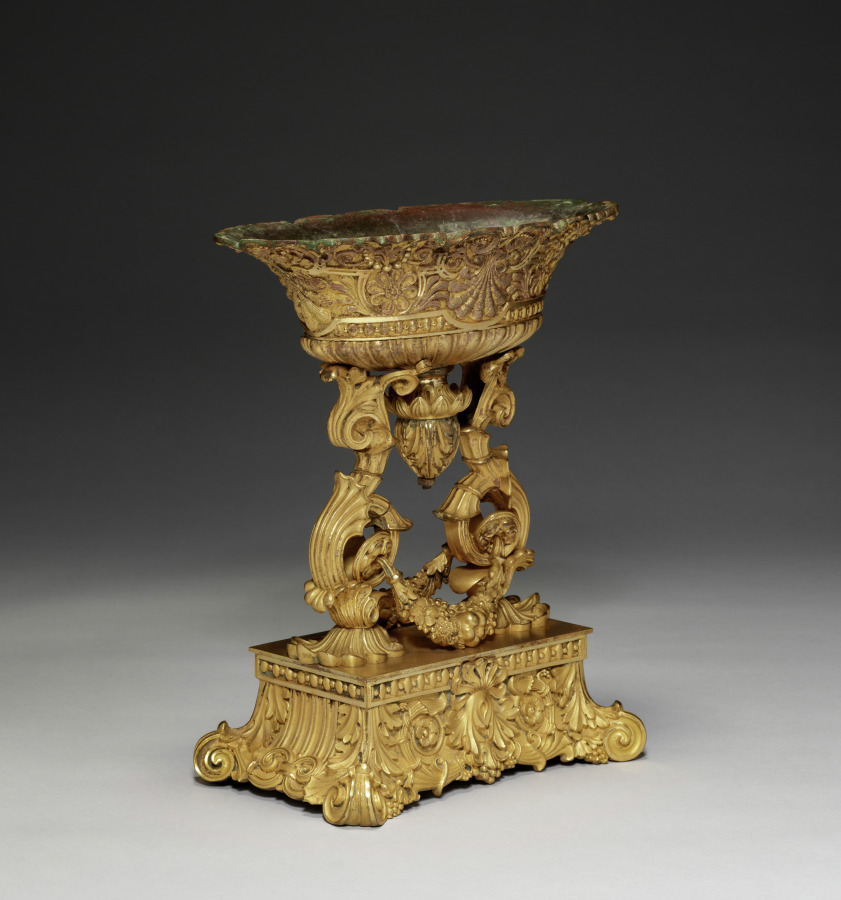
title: Centerpiece, or Jardinière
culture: France, Paris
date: c. 1830–1850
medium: gilt bronze with enamel flowers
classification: Metalwork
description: Regrettably, a maker's mark does not appear on this piece: thus the factory that made it remains unknown. Nevertheless, its design, castings, and gilding are of fine quality and indicate that it is the product of a group of talented craftsmen who worked in the robust taste of the second quarter of the 19th century.